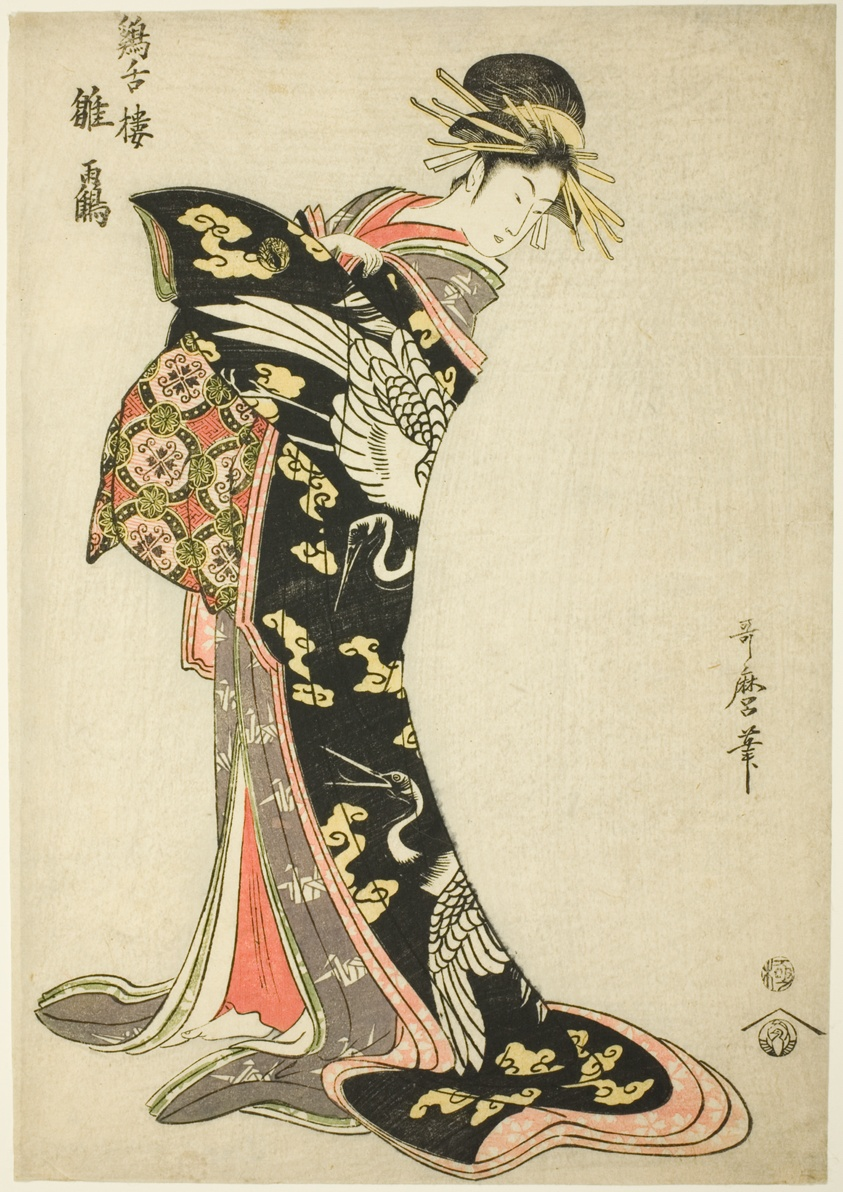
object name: Print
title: Hinazuru of the Keizetsuro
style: Japanese (culture or style)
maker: Kitagawa Utamaro 喜多川 歌麿; Japanese, 1753 (?)-1806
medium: Color woodblock print; aiban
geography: Japan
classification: woodblock print; print; asian art